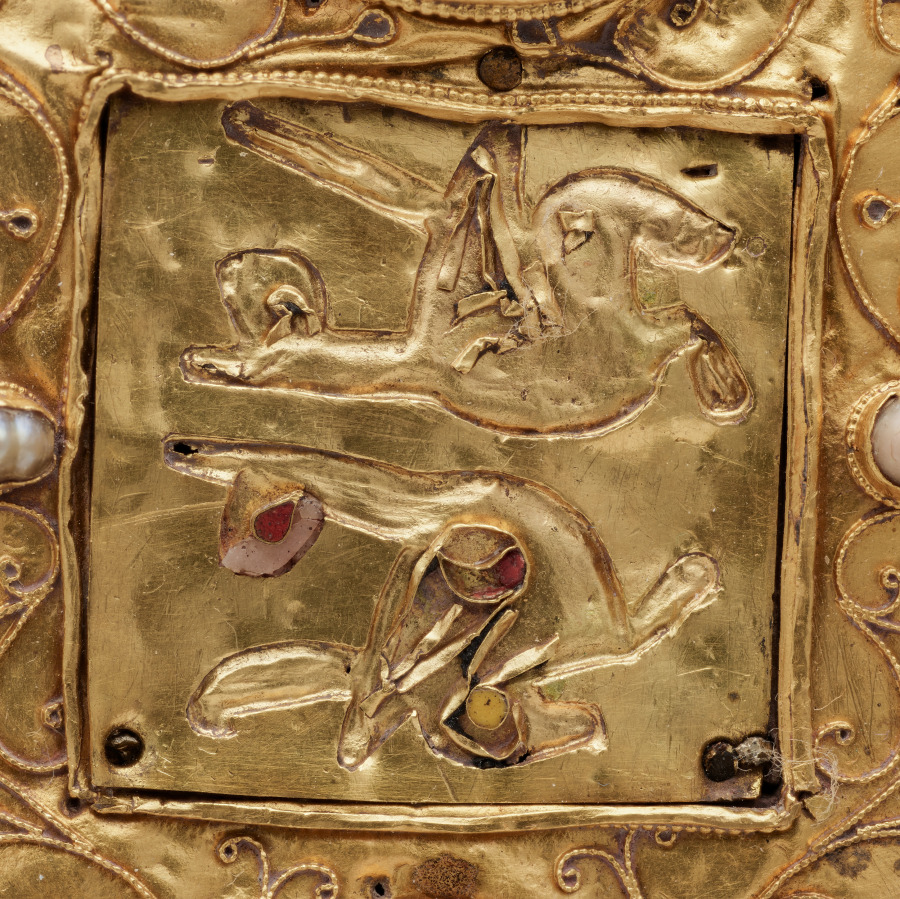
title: Ceremonial Cross of Count Liudolf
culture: Germany, Lower Saxony?, Romanesque period, 11th century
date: shortly after 1038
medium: gold: worked in repoussé; cloisonné enamel; intaglio gems; pearls; wood core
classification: Metalwork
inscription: translation of the inscription on back: Relics of the Holy Bishop Valerius, of the Holy Martyr Pancratius, of the Stone which was laid on the tomb of the Lord. This Gertrude had made for the spiritual welfare of Count Liudolf.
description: This precious gold cross was commissioned by Countess Gertrude (died 1077) and given to the church of Saint Blaise following the death of her husband, Count Liudolf of Brunswick (died 1038). The cross is decorated with a large oval-shaped chalcedony at its center and with slightly smaller rock crystals at its terminal ends. Fine but fragmentary cloisonné enamel plaques with pairs of confronting peacocks, symbols of immortality, appear at the center of each cross arms. They are set within an intricate system of filigree wire decoration imitating tendrils. Numerous pearls, three large intaglio gems, and various precious and semiprecious stones complete the decoration of the cross. Concealed behind the enamel plaque on the upper cross arm are relics of Saints Valerius and Pancratius as well as a fragment from the stone that sealed the Sepulcher of the Lord. The back of this cross is very worn, making it difficult to recognize the main features of its repoussé decoration. Faintly visible at the center is the Lamb of God, a symbol of Christ, with a cross-shaped halo. Depicted at the end of the cross arms are the symbols of the four Evangelists. A Latin inscription above the Lamb of God identifies the relics concealed behind it, namely "relics of the saintly bishop Valerius, of Pancratius martyr, [and] of the stone that was placed above the tomb of the Lord." A second inscription below states, "This [work] was commissioned by Gertrude for the soul of Count Liudolf," revealing the identity of the cross's patron and the approximate date of its commission.